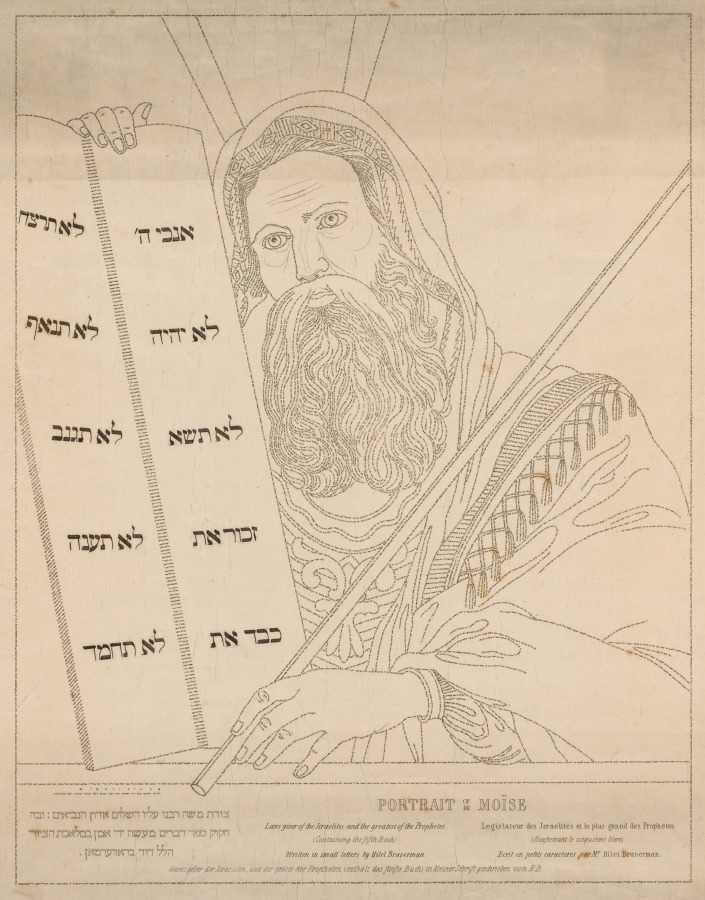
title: Portrait of Moses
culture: Germany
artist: Hillel Braverman (German or French)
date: c. 1870–1900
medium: engraving (micrography)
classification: Print